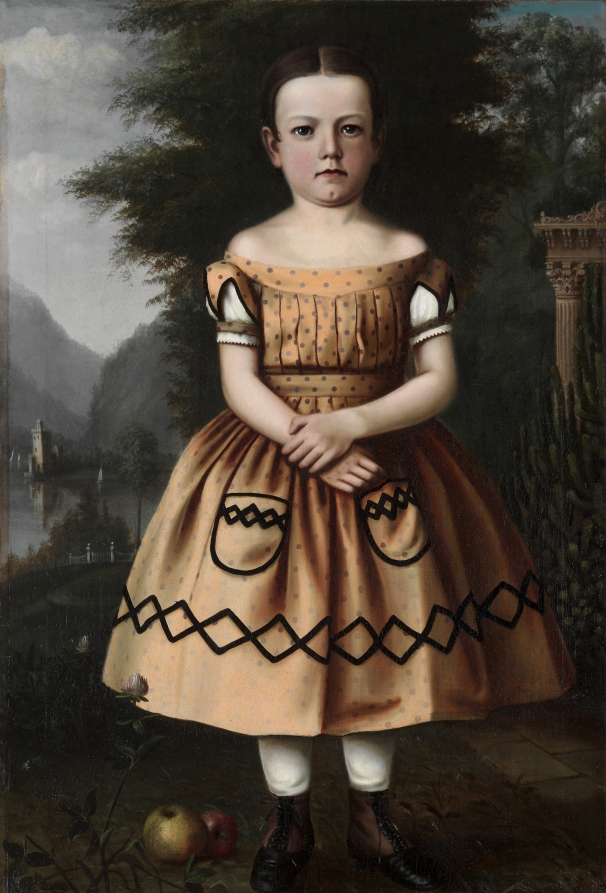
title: Minnie Willard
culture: America, Ohio, Cleveland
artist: Archibald Willard (American, 1836–1918)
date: 1860s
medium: oil on canvas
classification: Painting